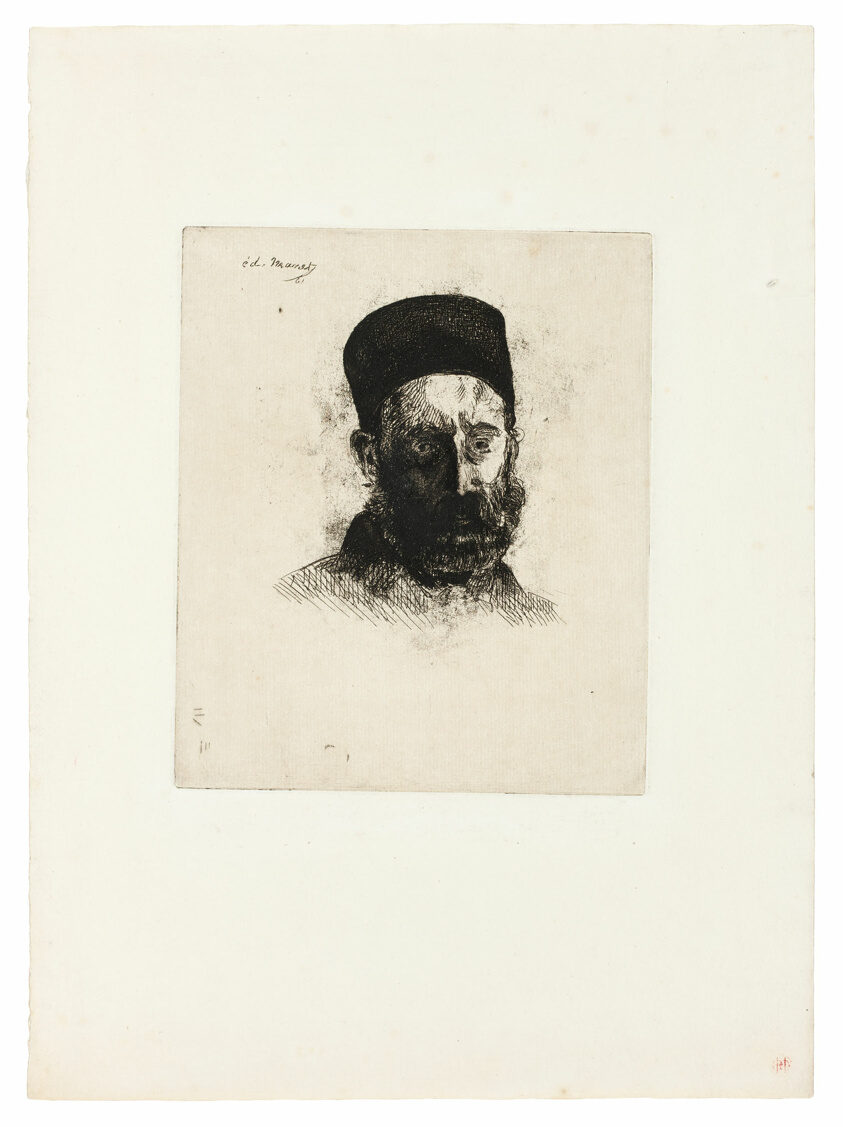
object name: Print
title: M. Manet (The Artist's Father) II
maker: Édouard Manet (French, 1832-1883)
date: 1861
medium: Etching, aquatint and plate tone in black on ivory laid paper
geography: France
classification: etching; print; prints and drawing